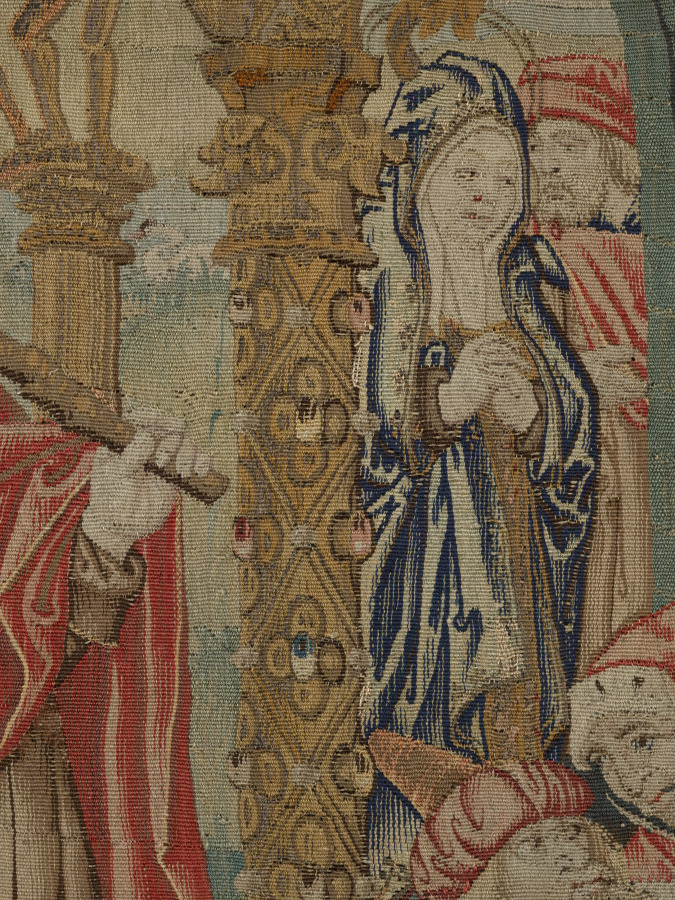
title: Altar Frontal: Scenes from the Childhood of Christ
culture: France and South Netherlands, 1500s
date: c. 1500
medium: Wool, silk, gold thread; tapestry weave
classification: Tapestry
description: Pictorial tapestries were symbols of wealth and more highly prized than paintings. Small tapestries with Christian imagery were frequently commissioned to embellish the fronts of altars. This example displays the Massacre of the Innocents, the Flight into Egypt, and Christ among the Doctors. Tapestry weave is ideal for creating narrative scenes. The technique can be compared to painting, as each colored weft (horizontal thread) is interlaced with warps (vertical thread) where needed for the pattern. As expensive investments, tapestries have the advantage of being portable and easily stored and displayed.